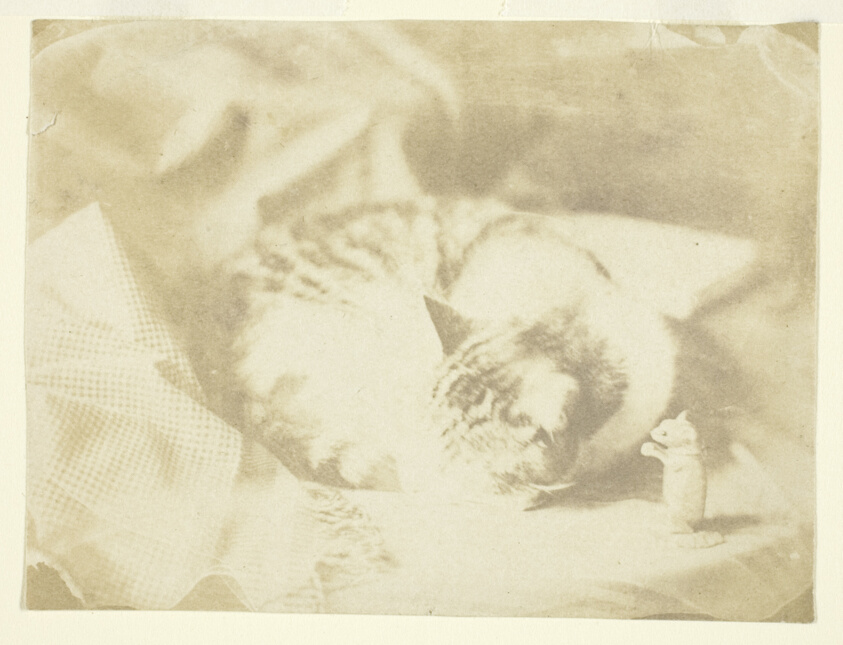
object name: Photograph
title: Mrs. Craik's Cat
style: 19th century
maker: Artist unknown, possibly Benjamin Mulock (English, 1829–1863); English, 19th century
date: 1850/59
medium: Calotype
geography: England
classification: salted paper print; photographic process; photography; photograph